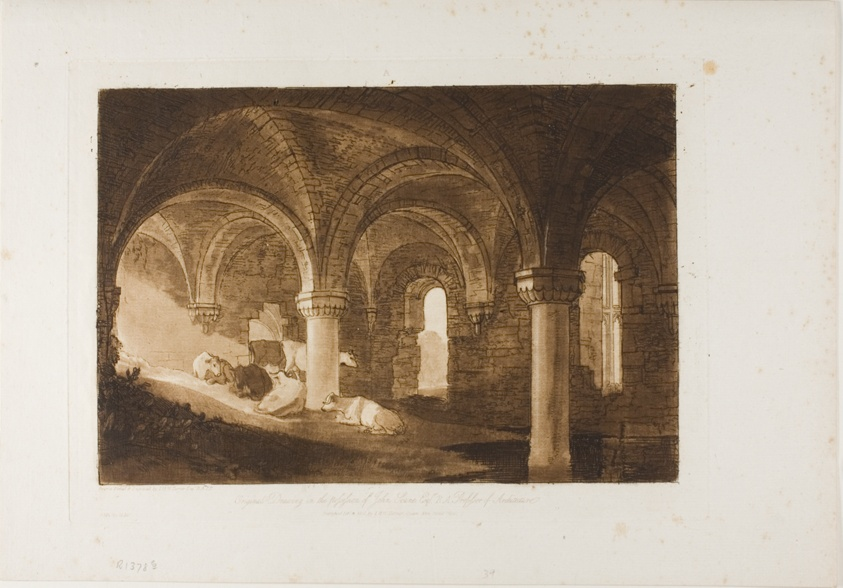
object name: Print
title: Crypt of Kirkstall Abbey, plate 39 from Liber Studiorum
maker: Joseph Mallord William Turner (English, 1775-1851)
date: published February 11, 1812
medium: Etching and engravng in brown on ivory laid paper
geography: England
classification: etching; print; prints and drawing